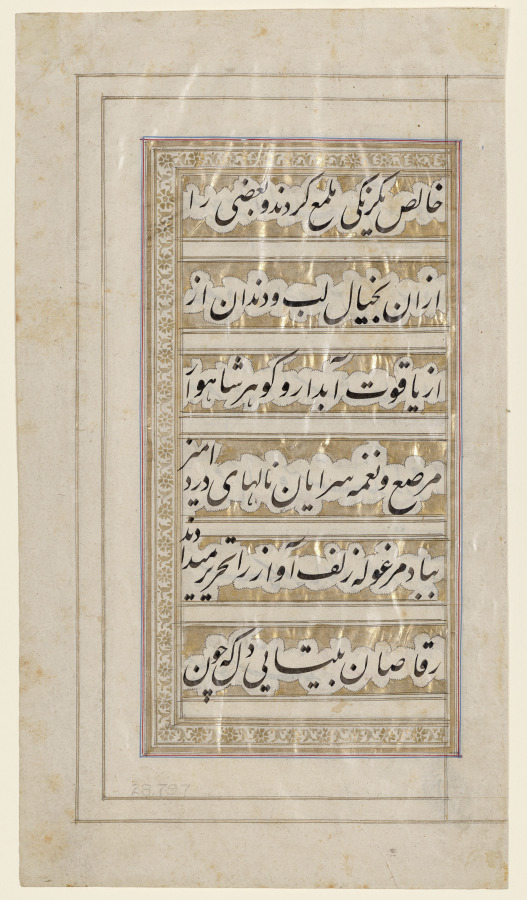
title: Page from the Poem of Beauty and Love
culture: India, Kashmir, Mughal, 19th century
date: 1848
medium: painting on paper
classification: Painting